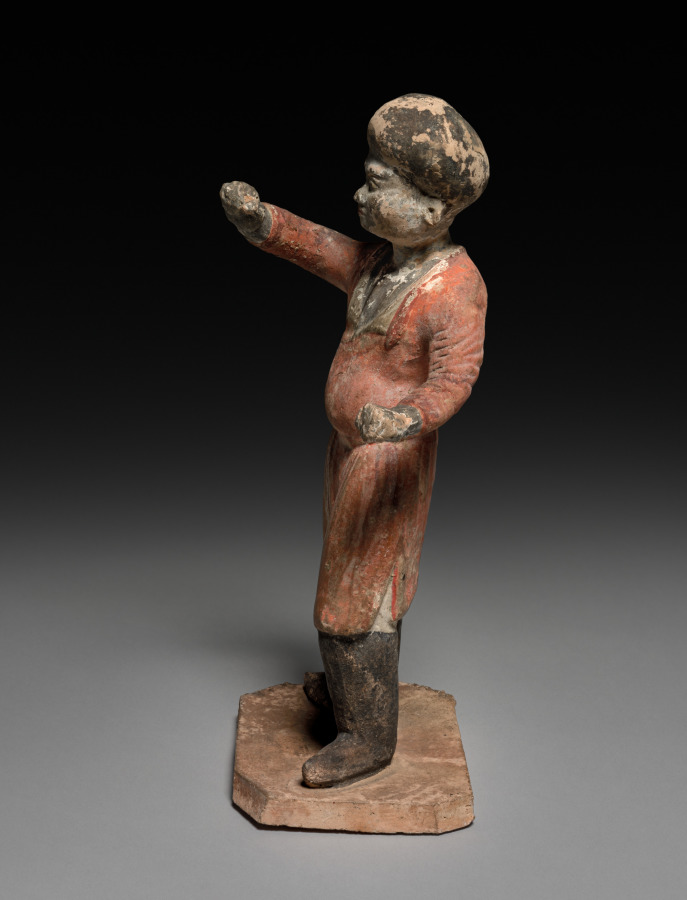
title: Groom (Tomb Figure)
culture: China, Sui dynasty (581-618) - Tang dynasty (618-907)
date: late 500s–early 600s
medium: buff earthenware with polychromy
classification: Sculpture